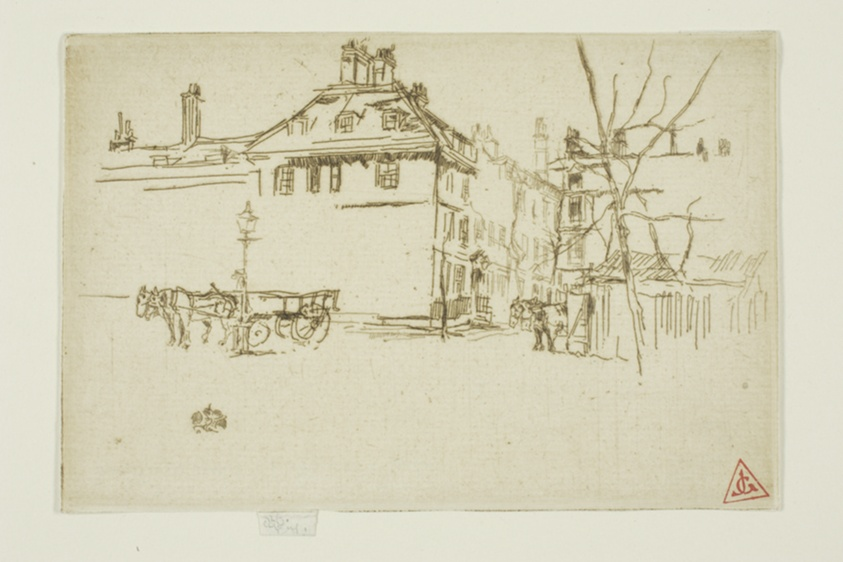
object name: Print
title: The Temple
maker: James McNeill Whistler (American, 1834-1903)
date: 1880/81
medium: Etching in brown ink on ivory laid paper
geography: United States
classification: etching; print; prints and drawing; paper